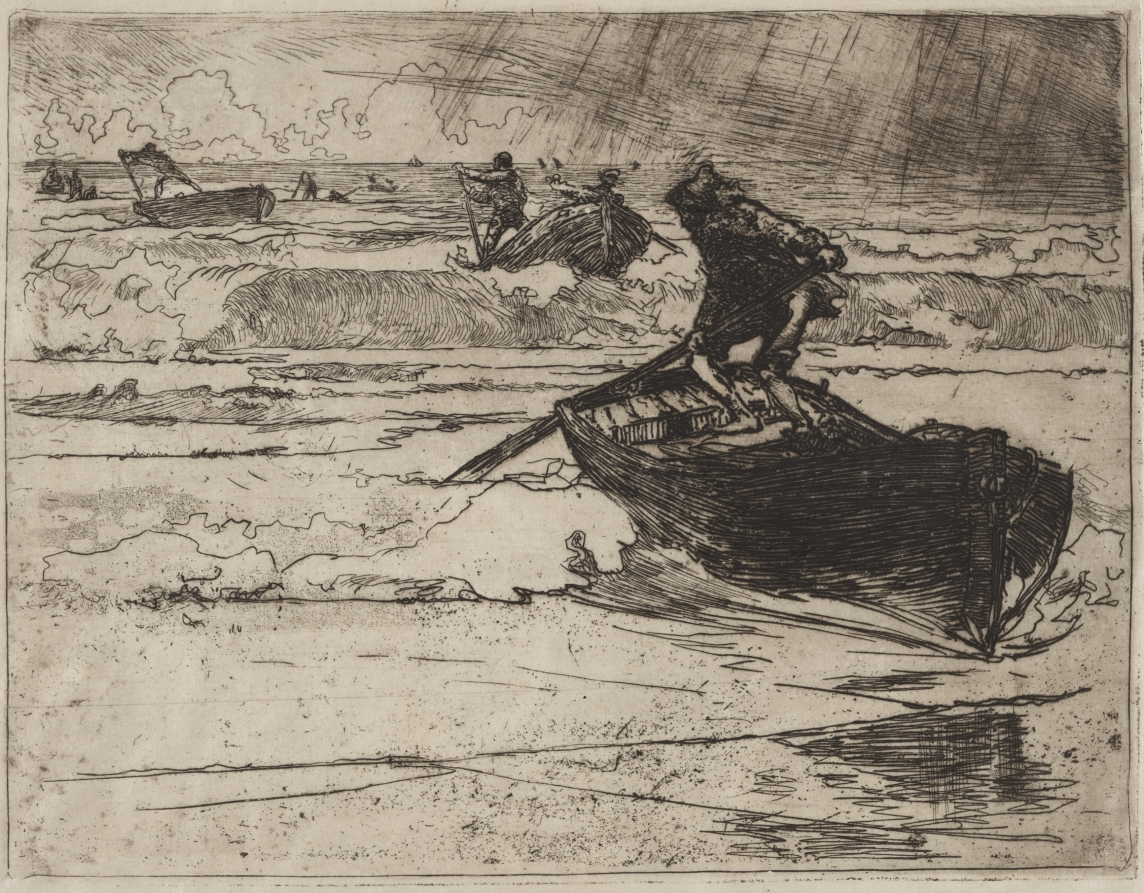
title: Pêcheurs Fuyants devant l'Orage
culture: France, 19th century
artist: Auguste Louis Lepère (French, 1849–1918)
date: 1892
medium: etching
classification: Print